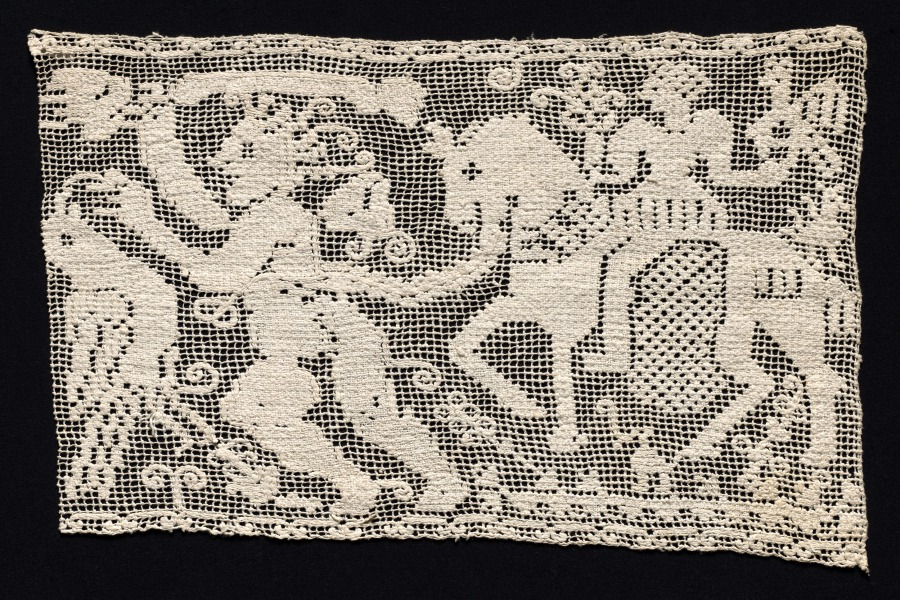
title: Fragment of a Band with Male Figure Leading Mounted Female Figure with Falcon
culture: Italy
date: 1500s–1600s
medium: Bleached linen (est.): needle lace; filet/lacis (knotted ground and darned in two directions)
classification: Lace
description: This fragment may depict a hunting scene. A male figure leads a female figure on horseback. The male figure, possibly of non-western heritage, seems to carry a weapon in his right hand and the bird he has hunted in his left.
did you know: The forward tilt of the male figure and the horse’s raised hooves create a sense of dynamic movement.